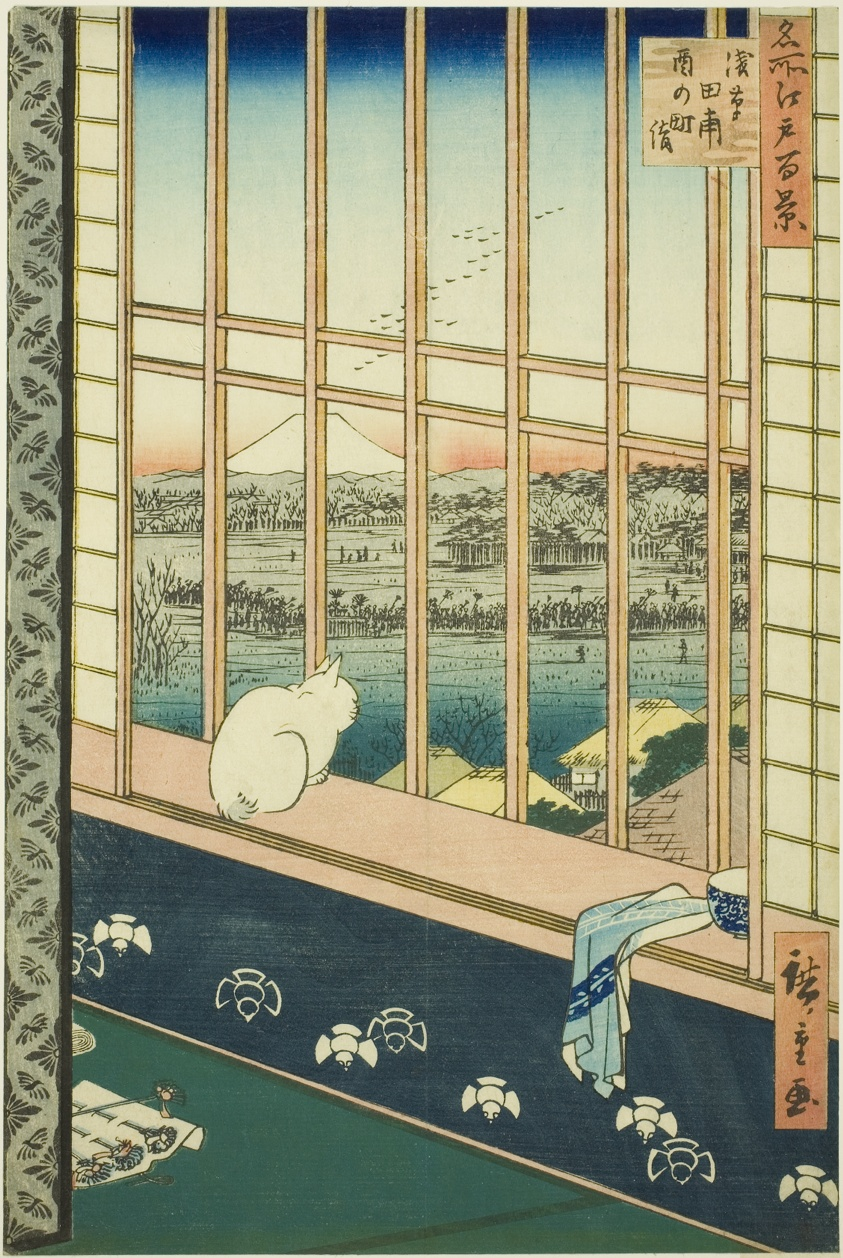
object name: Print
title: Asakusa Rice Fields and Torinomachi Festival (Asakusa tanbo Torinomachi mode), from the series "One Hundred Famous Views of Edo (Meisho Edo hyakkei)"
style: Japanese (culture or style)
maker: Utagawa Hiroshige 歌川 広重; Japanese, 1797-1858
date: 1857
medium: Color woodblock print; oban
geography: Japan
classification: woodblock print; print; asian art